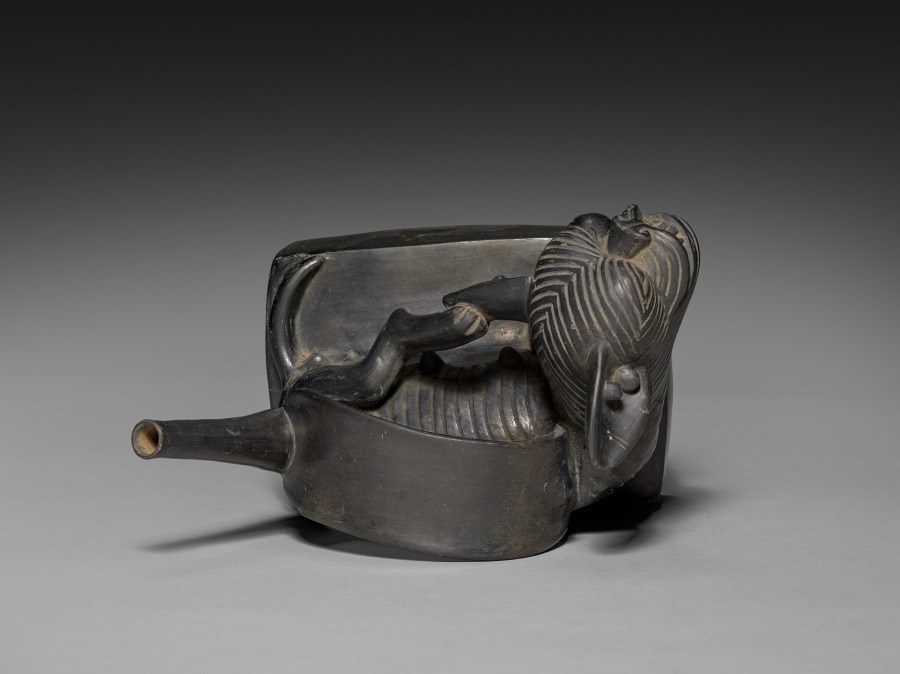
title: Vessel with Reclining Dog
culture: Central Andes, North Coast, Chimú-Inka style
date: 1470–1532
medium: ceramic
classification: Ceramic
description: This vessel represents a Peruvian hairless dog who has recently given birth and seems to be taking a break from maternal obligations. The meanings of such dogs may be connected to the trade networks that brought them to Peru from Mexico in the late pre-Hispanic period. Perhaps these foreign ties made them prestige animals whose breeding engendered further status for the owner.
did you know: This vessel represents a Peruvian hairless dog who has recently given birth.